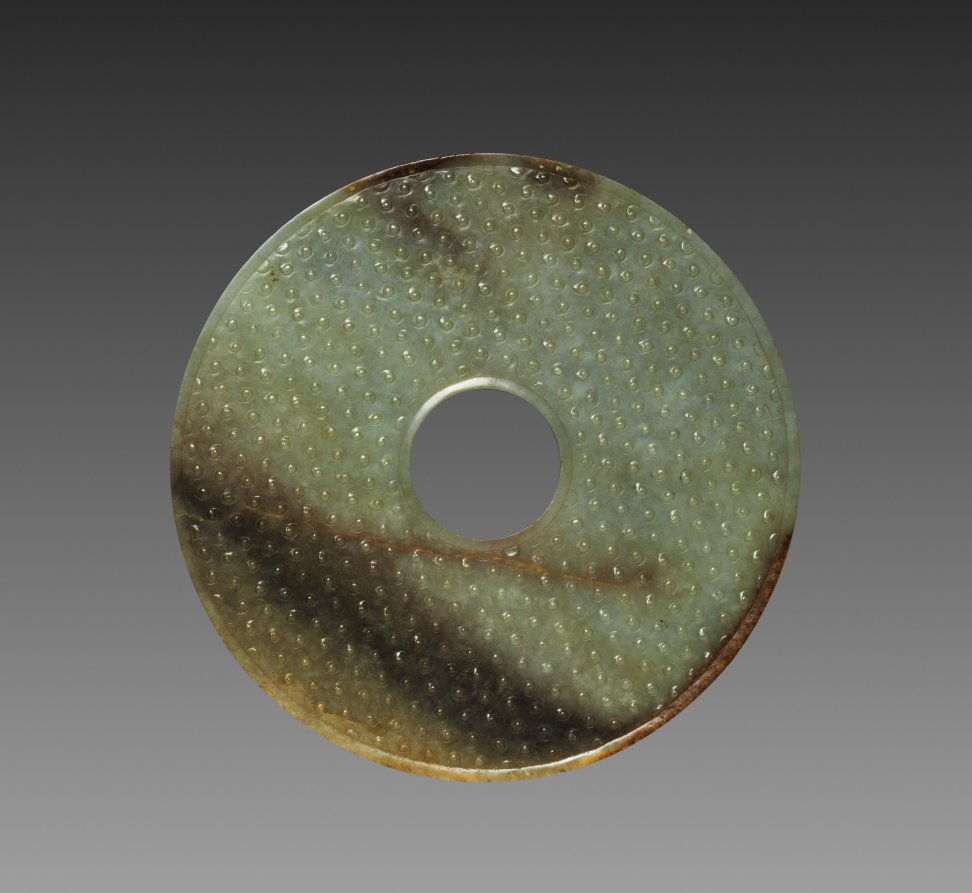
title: Ceremonial Disk with Grain Pattern (Bi)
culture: China, Warring States period (475–221 BCE)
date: 475–221 BCE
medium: jade (nephrite)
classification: Jade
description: Jade disks of later centuries developed from the Neolithic period’s plain design to incorporate dense surface decoration. This example bears raised dots with finely incised spirals--so-called grain patterns--arranged in diagonal rows.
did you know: The disk's outer rim is incised with a 47-character poem written in seal script, dated to the gengyin year of the Qianlong emperor's reign [1770].